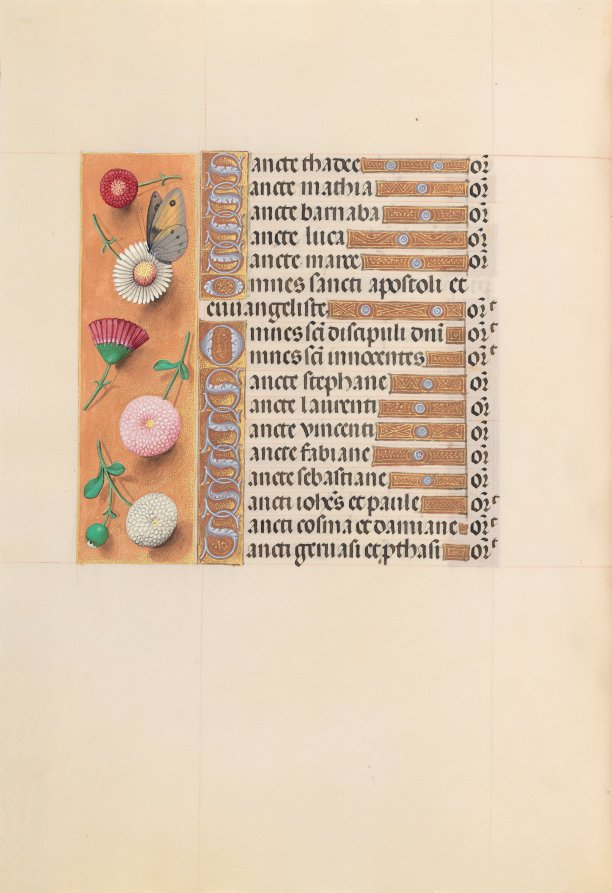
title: Hours of Queen Isabella the Catholic, Queen of Spain: Fol. 211v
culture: Flanders, Ghent and Bruges, late 15th century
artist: Master of the First Prayerbook of Maximillian (Flemish, c. 1444–1519)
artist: and Associates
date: c. 1500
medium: ink, tempera, and gold on vellum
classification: Bound Volume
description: This manuscript was illuminated by a circle of at least five highly organized manuscript painters active in the Flemish cities of Ghent and Bruges. The principal illuminator was Alexander Bening, who painted the majority of the book's miniatures. Manuscripts produced by this circle of artists are renowned for the decoration of their borders, which typically feature a rich variety of realistically-painted flowers, birds, and butterflies. This prayer book, called a book of hours, was intended not for a cleric, but for the private devotions of a lay person-in this case, Isabella the Catholic, Queen of Spain (1451-1504). Isabella's coat of arms embellishes the book's frontispiece. It is unlikely that the book was commissioned by the Queen herself; rather, she probably received it as a diplomatic gift from someone courting her patronage, perhaps Cardinal Francisco Jimenez de Cisneros. A Franciscan friar, Jimenez was dependent upon Isabella for his advancement, first to the post of Queen's confessor in 1492, and then to Archbishop of Toledo in 1495.